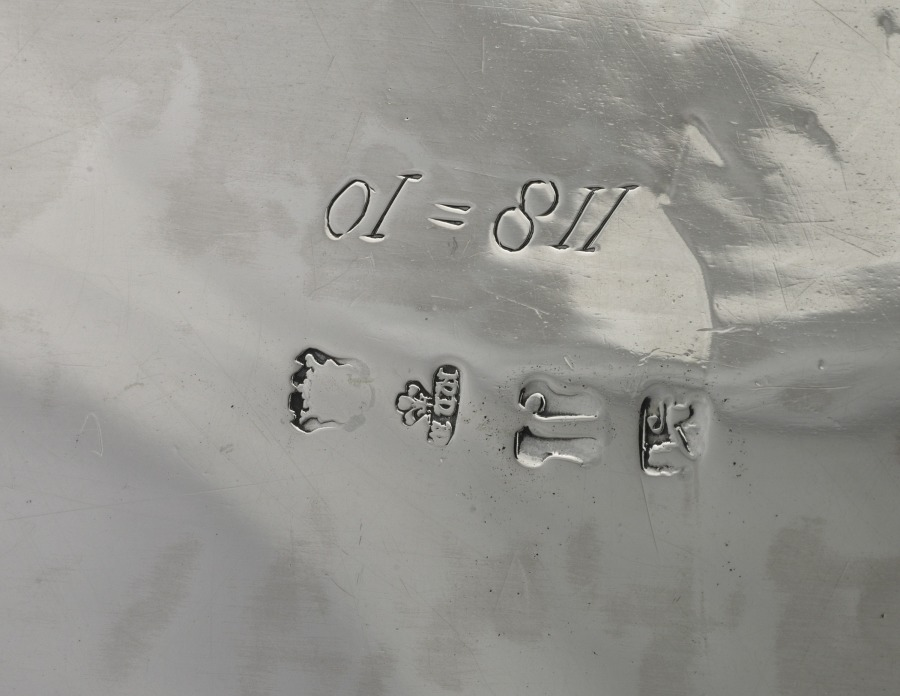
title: Covered Tureen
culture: England, 18th century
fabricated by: Edward Wakelin (British, 1784)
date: 1753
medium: silver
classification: Silver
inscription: engraved coat of arms of Admiral Edward Vernon of Nacton (1684-1757) and his wife Sarah, daughter of Thomas Best. Engraved on cover is Vernon crest, a woman holding a scythe.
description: A very successful silversmith, Edward Wakelin may have been more a businessman than a craftsman or designer.